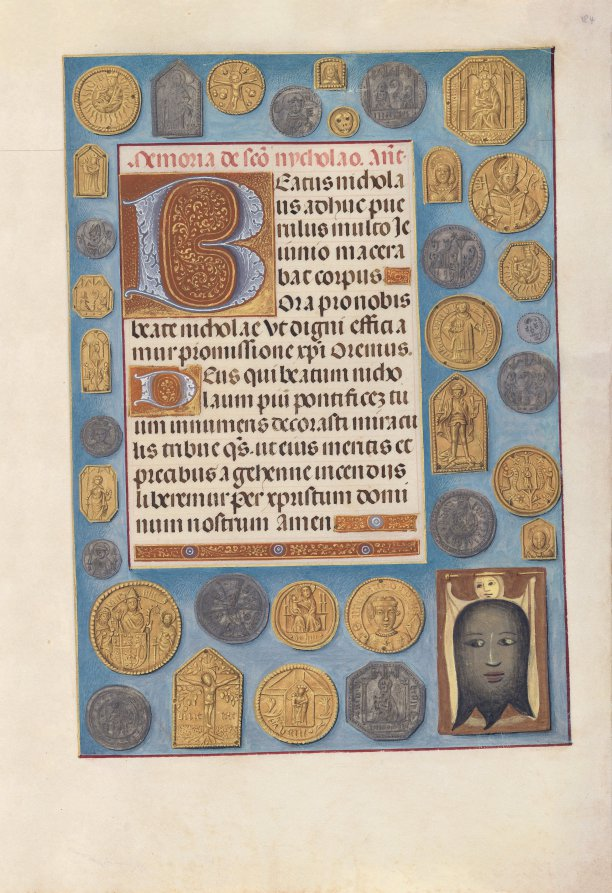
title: Hours of Queen Isabella the Catholic, Queen of Spain: Fol. 184r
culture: Flanders, Ghent and Bruges, late 15th century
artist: Master of the First Prayerbook of Maximillian (Flemish, c. 1444–1519)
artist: and Associates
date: c. 1500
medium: ink, tempera, and gold on vellum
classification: Bound Volume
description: This manuscript was illuminated by a circle of at least five highly organized manuscript painters active in the Flemish cities of Ghent and Bruges. The principal illuminator was Alexander Bening, who painted the majority of the book's miniatures. Manuscripts produced by this circle of artists are renowned for the decoration of their borders, which typically feature a rich variety of realistically painted flowers, birds, and butterflies. This prayer book, called a book of hours, was intended not for a cleric, but for the private devotions of a lay person—in this case, Isabella the Catholic, Queen of Spain (1451–1504). Isabella's coat of arms embellishes the book's frontispiece. It is unlikely that the book was commissioned by the Queen herself; rather, she probably received it as a diplomatic gift from someone courting her patronage, perhaps Cardinal Francisco Jimenez de Cisneros. A Franciscan friar, Jimenez was dependent upon Isabella for his advancement, first to the post of Queen's confessor in 1492, and then to Archbishop of Toledo in 1495.